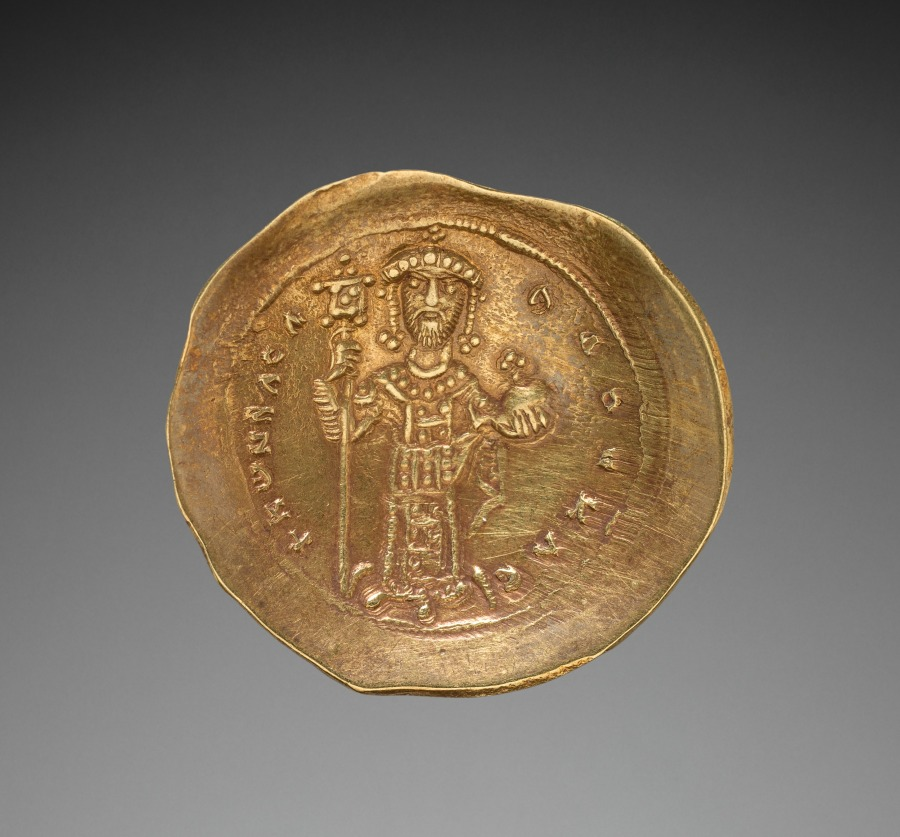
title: Scyphate Histamenon of Constantine X (obverse)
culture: Byzantium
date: 1059–1067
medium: gold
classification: Coins